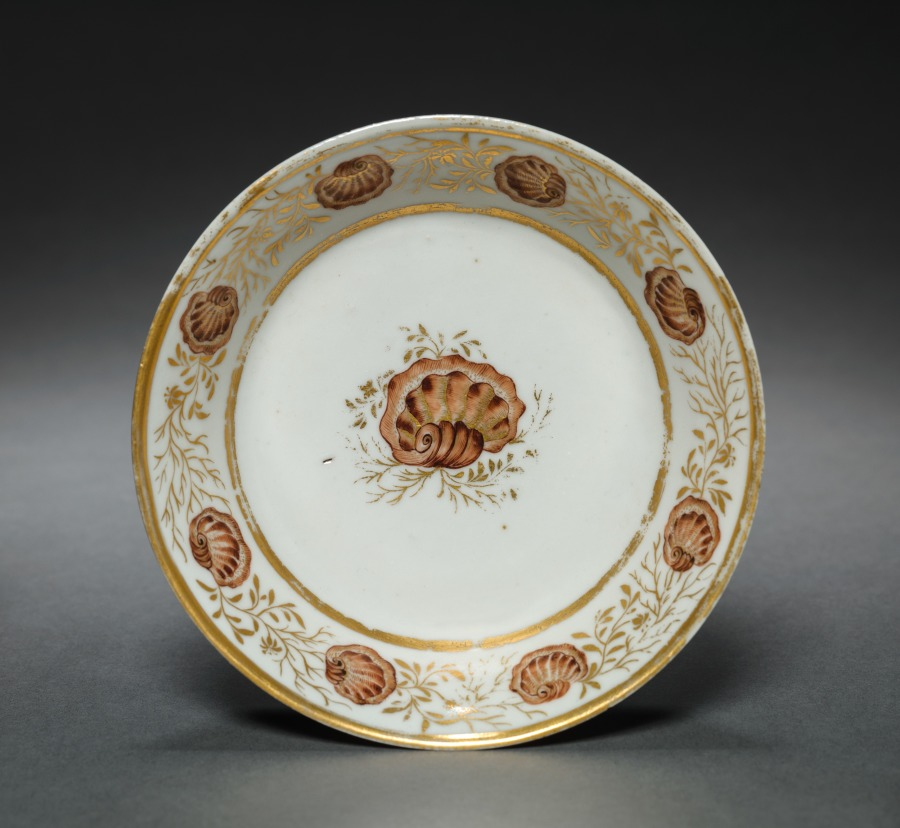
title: Saucer from Oliver Wolcott, Jr. Tea Service (4 of 6)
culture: Chinese Export porcelain, late 18th-early 19th century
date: 1785–1805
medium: porcelain, sepia enamel, gold leaf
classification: Ceramic